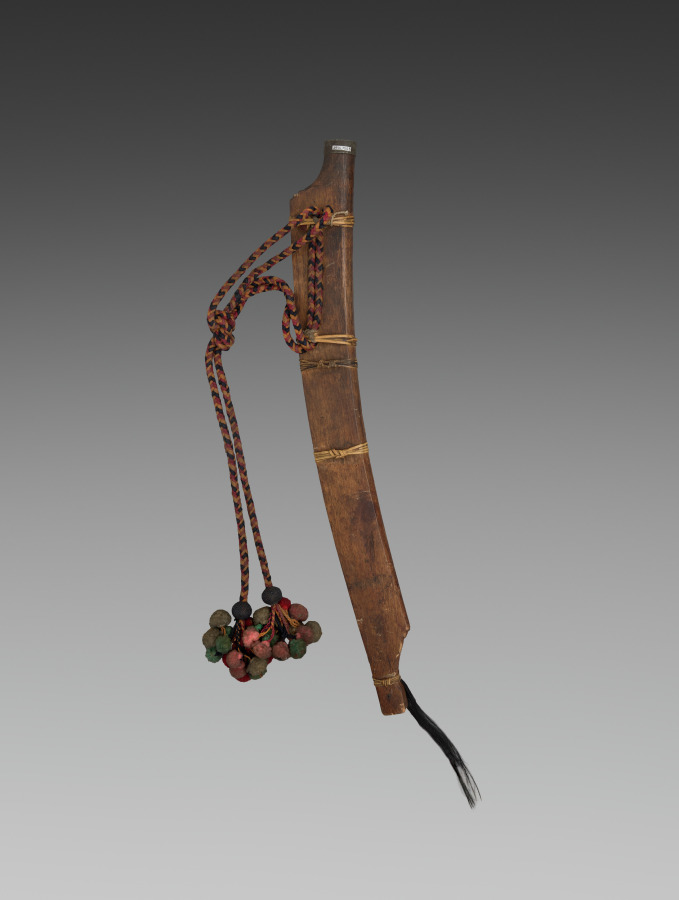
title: Scabbard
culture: Philippines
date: before 1916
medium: Wood and metal with braided cloth cord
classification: Arms and Armor